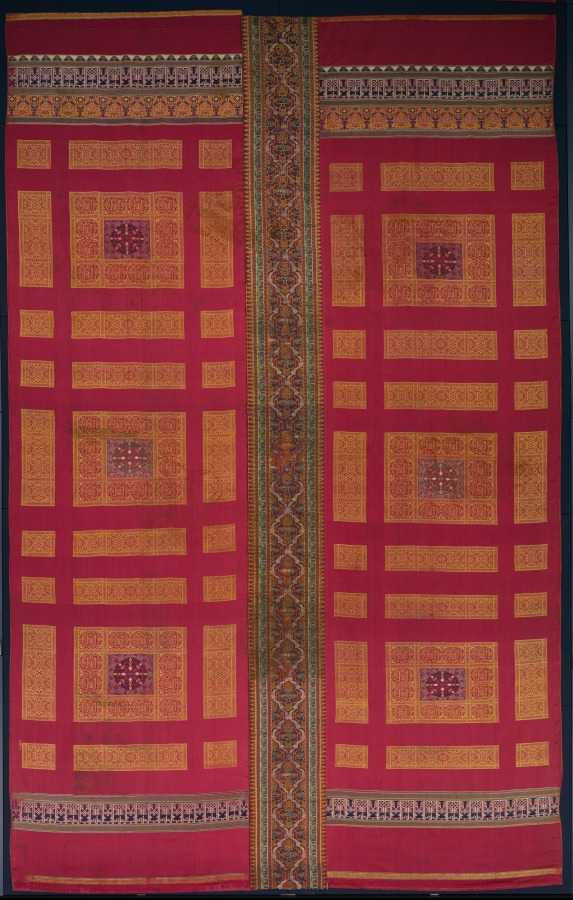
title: Silk curtain from the Alhambra palace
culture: Spain, Granada, Nasrid period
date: 1300s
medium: lampas and taqueté: silk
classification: Textile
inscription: the bold knotted Kufic inscription in the top and bottom borders of the side panels repeats the Arabic word "felicity." Within the arches forming a frieze in the top border is a Kufic inscription "good fortune" and a Naskhi inscription repeating trhe motto of the Nasrid dynasty, "There is no conqueror but God." In the borders of the three large ornamental rectangles on each side panel is the Naskhi inscription "Dominion belongs to God alone." On the central panel the inscriptions in the borders repeat the phrase, "Majestry is God's," while the Nasrid motto, "There is no conqueror but God" and, above, "Blessing," are inscribed in the arabesque ogives.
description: This is one of two of the largest, most complete, and most ornate curtains to survive from the 1300s when it presumably hung in the royal Alhambra Palace in Granada, the last Muslim stronghold in Spain. Its style, artistic vocabulary, and harmonious proportions reflect the magnificent wall decoration in the Alhambra. The motto of the ruling Nasrid dynasty, "There is no conqueror but God," is inscribed in the end borders and central panel. The inscribed striped silk forming the central panel is more worn, suggesting that it was recycled, most likely during the 1300s.